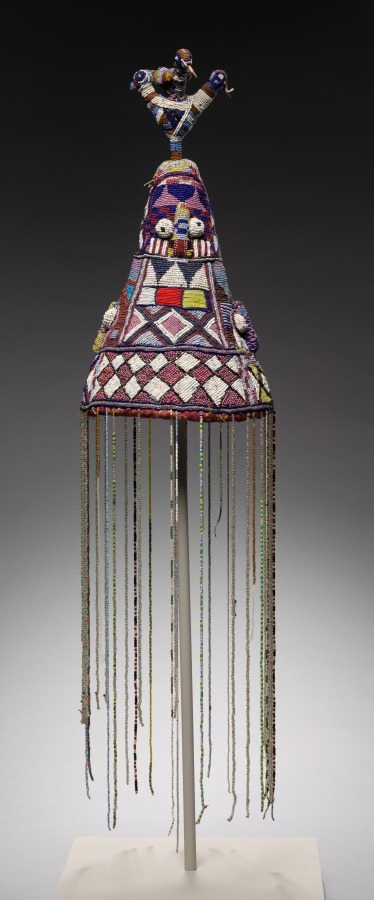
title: Crown (adéńlá)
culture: Africa, West Africa, Nigeria, Yorùbá-style maker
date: 1900s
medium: Cloth (probably cotton and wool), glass beads, reeds, cardboard, wood, plant fiber, cotton, and quills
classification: Garment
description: The most important of all regalia, topped with the "royal bird" Okin, this headdress connects the king to Oduduwa, the mythical founder of the Yoruba. The veil of beaded strings masks the identity of the wearer and protects his subjects from the supernatural powers that radiate from his face. The crown also signifies the "inner head" of the king, the locus of an awesome life force called ase.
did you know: No one––not even the king who wears it––is allowed to look inside this crown, as that's where it is most powerful.